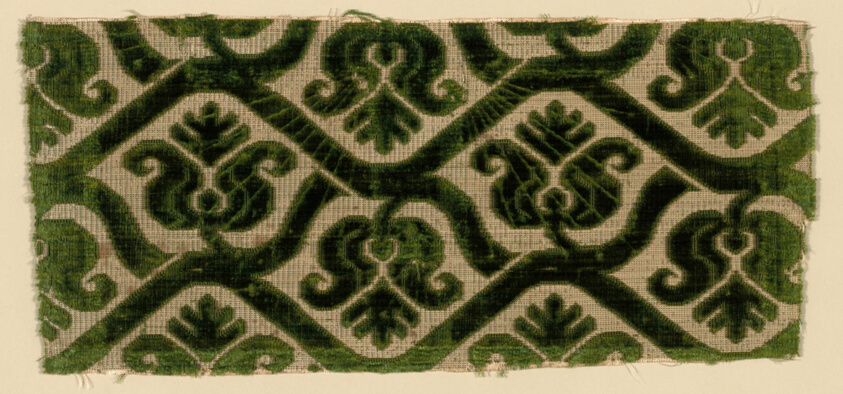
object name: Textile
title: Fragment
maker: Italy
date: c. 1600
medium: Silk and silver gilt strips, plain weave with supplementary patterning wefts and supplementary pile warps forming cut, uncut, and voided velvet; stamped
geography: Italy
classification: textile; weaving - velvet